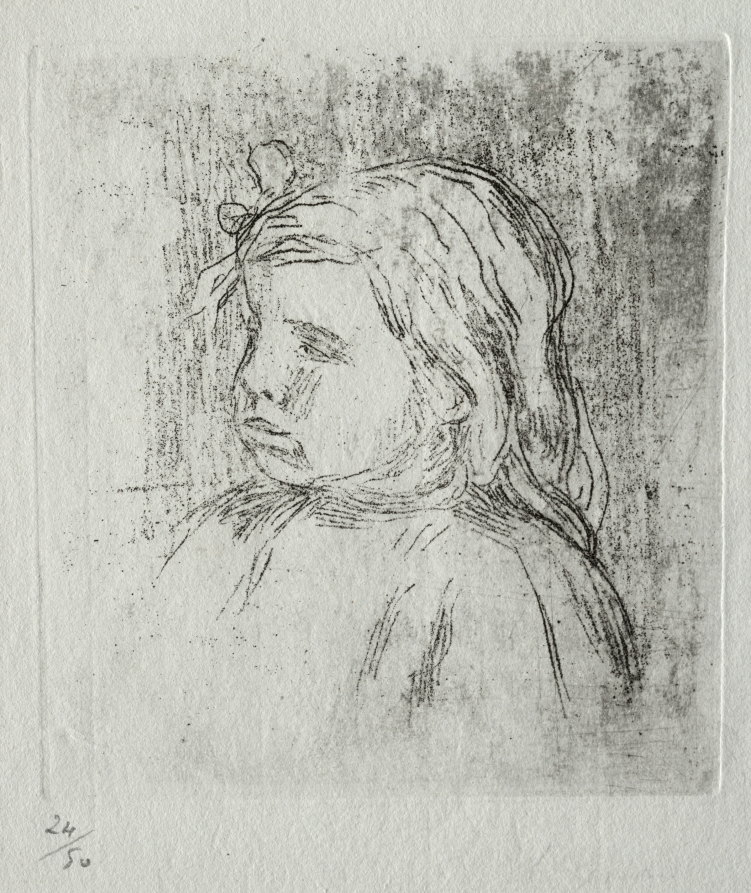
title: Claude Renoir, de trois-quarts à gauche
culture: France, late 19th-early 20th Century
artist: Pierre-Auguste Renoir (French, 1841–1919)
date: 1908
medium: softground etching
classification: Print